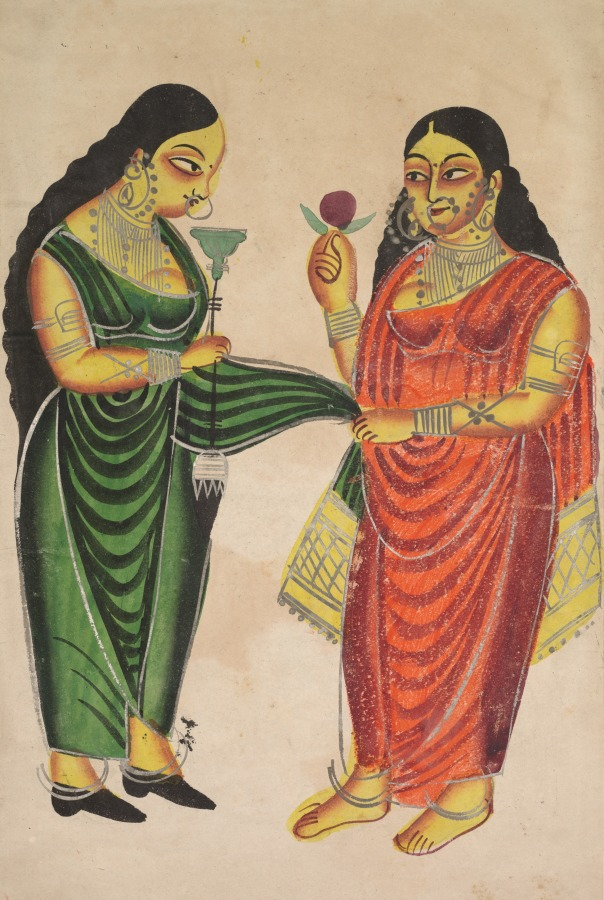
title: Maid bringing a hookah to a lady (recto), from a Kalighat album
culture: Eastern India, Bengal, Kolkata, Kalighat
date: c. 1890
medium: Gum tempera, graphite, ink, and tin on paper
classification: Painting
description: Kalighat paintings reflect the time and context in which they were created. Kalighat painters used their medium to offer penetrating and insightful critiques of British-influenced Indians as well as the British themselves through satires and caricatures. Newly rich Bengali native Indian clerks (babus) aspired to dress and behave like their British masters, and Kalighat painters taunted them for this. The maid, dressed in green, holds a hookah in her right hand. The lady in red is likely a fashionable high society concubine or prostitute known and depicted at this time as hookah-smoking, makeup-wearing, paan- (betel leaf with areca nut and lime paste) chewing hussies. The wealth created by the East India Company made it possible for Bengali babu dandies to have concubines and pay for prostitutes.